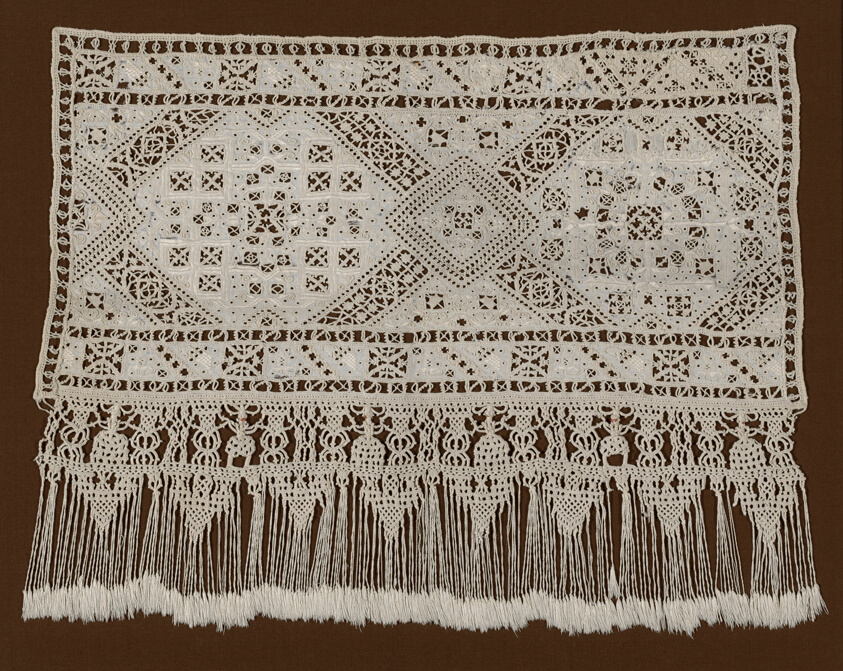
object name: Textile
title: Border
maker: Italy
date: 1601/25 (macramé edge: c. 1600)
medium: Linen, plain weave; cut and drawn work in buttonholed, darned, and overcast bars with buttonholed picots; embroidered in buttonhole, double running, hem, interlocking lace, overcast, and satin stitches; buttonholed couching; macramé edge with knotted fringe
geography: Italy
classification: textile; lace - needle